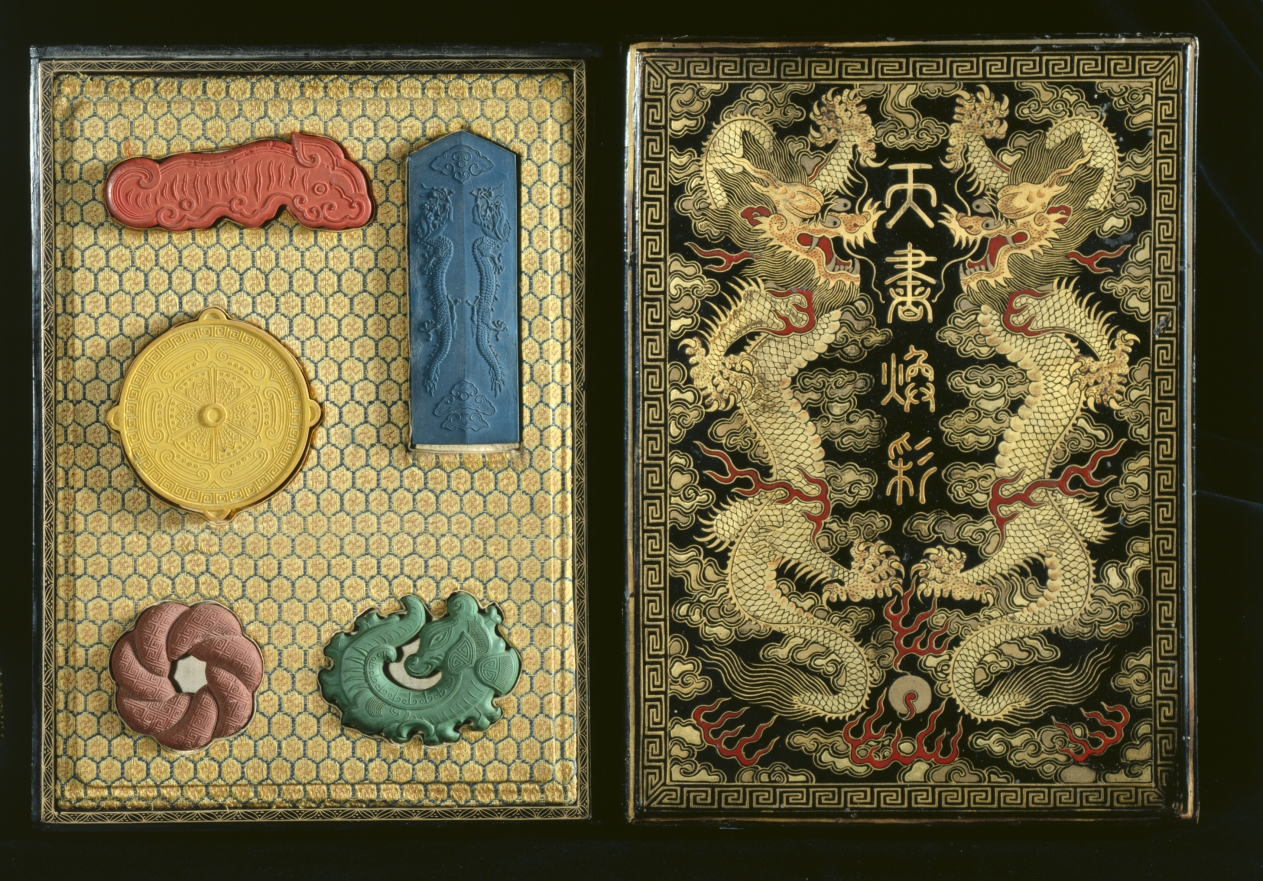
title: Box with Ink Cakes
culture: China, Qing dynasty (1644-1911), Jiaqing reign (1795-1820)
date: 1795–1820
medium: Lacquer and silk box; molded ink in red, yellow, blue, and green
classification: Lacquer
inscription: 江西巡撫臣陳淮恭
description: Ink cakes (also called ink sticks) are dissolved with the addition of water and then ground on the surface of a flat square stone into liquid ink for painting and calligraphy. The precious ink cakes here, however, have never been used. The inscription on the side of the blue Gui scepter-shaped ink cake says that the set was commissioned by Chen Huai, Governor of Jiangxi province. The green and bright red ink cakes take the forms of archaic dragons. The dull red ink cake resembles a brocade knot. The yellow cake shaped like the Buddhist "Wheel of the Law" is inscribed on the reverse.